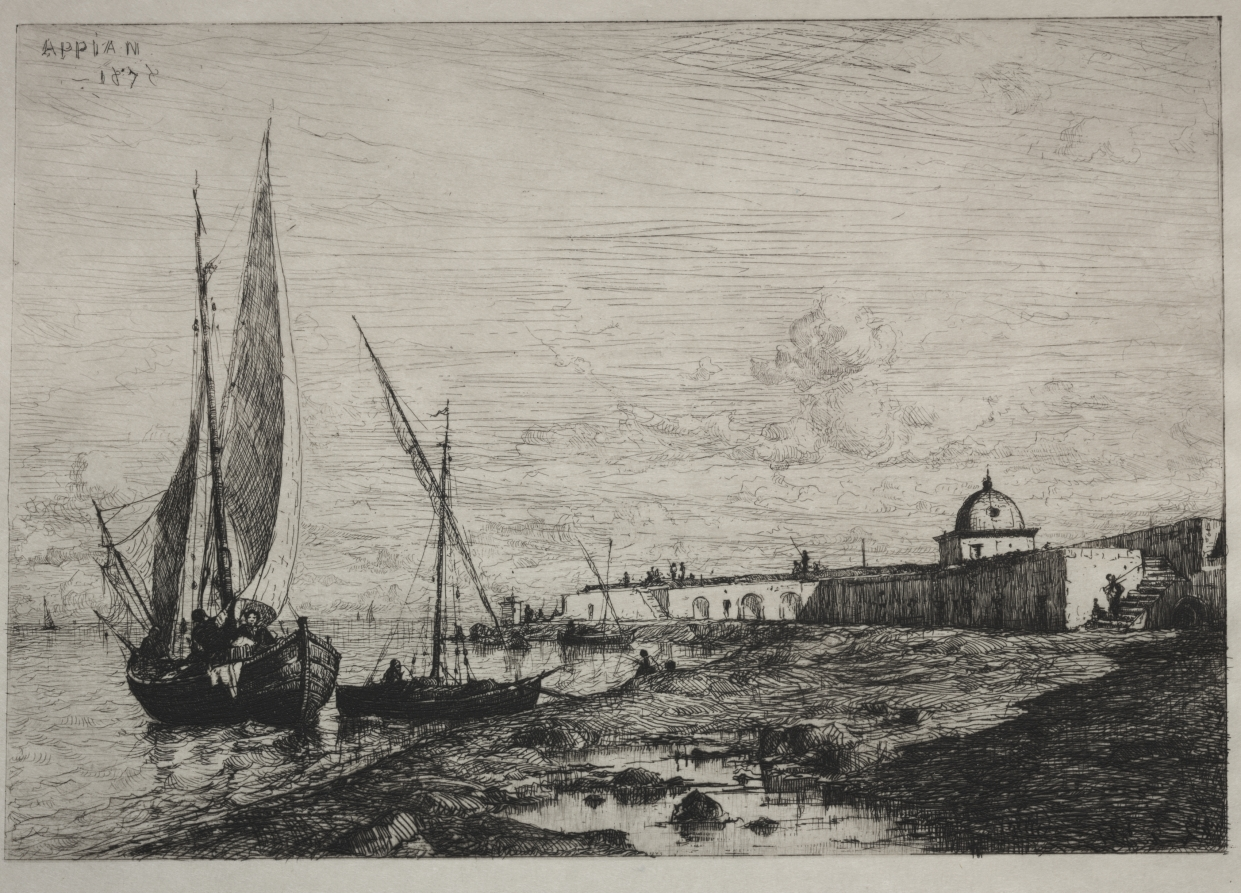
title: The Port at San Remo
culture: France, 19th century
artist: Adolphe Appian (French, 1818–1898)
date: 1878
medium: etching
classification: Print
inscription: upper left, in plate: Appian 1878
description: Appian was one of the outstanding landscape painters of the 19th century in Lyon. He was also an excellent etcher who was extremely sensitive to light and atmosphere. He was able to create a mood with line and by carefully leaving a fine layer of ink on the surface of the copper plate which prints as pale tone.